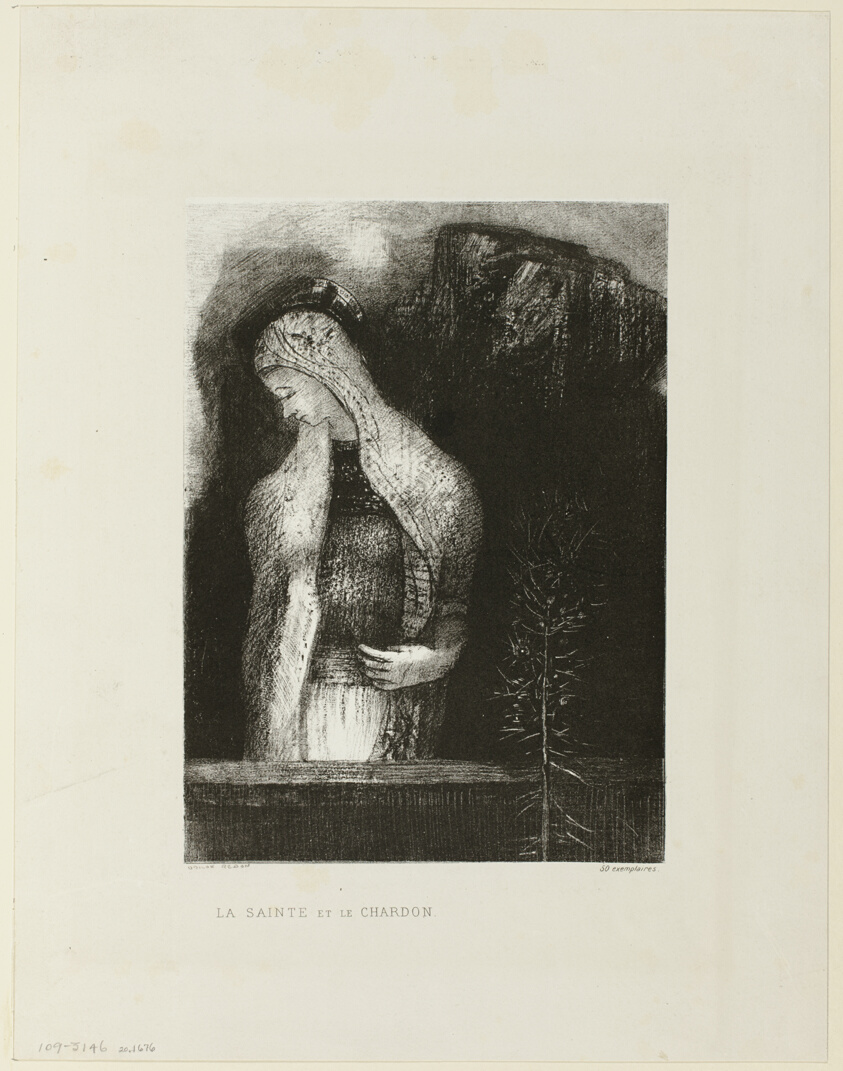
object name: Print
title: Female Saint and Thistle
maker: Odilon Redon (French, 1840-1916)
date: 1891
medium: Lithograph in black on white China paper laid down on ivory wove paper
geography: France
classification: lithograph; print; prints and drawing; paper